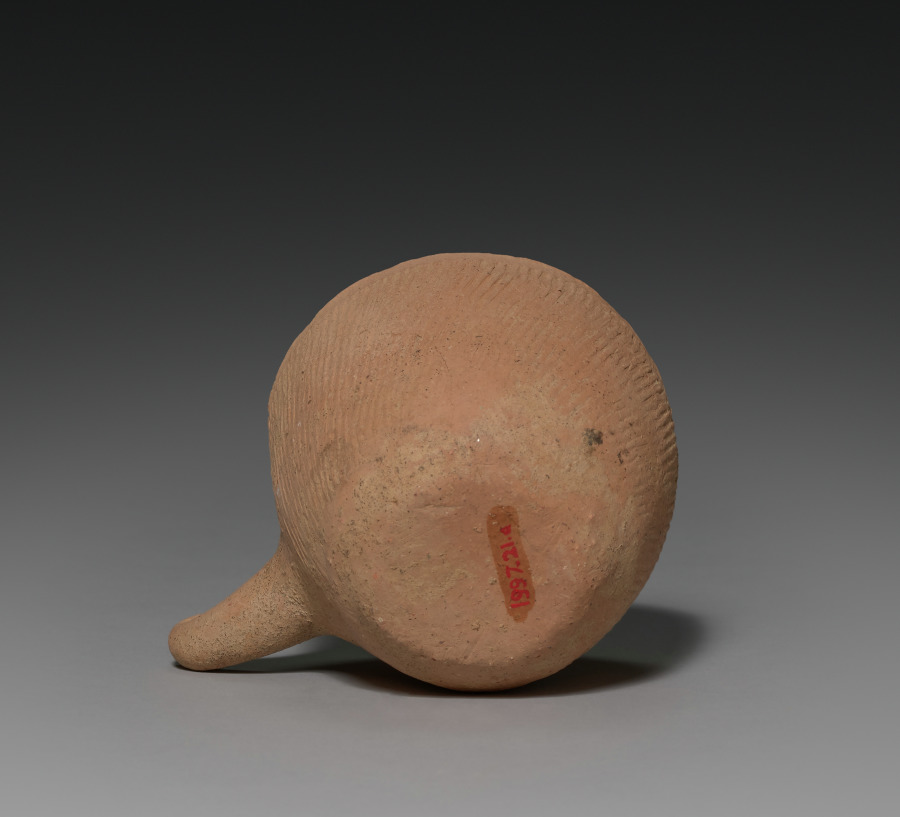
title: Covered Jar with Horn Handle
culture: Korea, Silla (57 BC-935) or Kaya (AD 42-562) period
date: 400s–500s CE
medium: red earthenware with impressed designs and applied red slip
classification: Ceramic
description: Early earthenware from the Three Kingdoms period (57 BCE–668 CE) became widely utilized as agriculture and religion grew to be essential elements in sustaining society and its systems. The clay jars of different sizes and shapes on display were made for the following purposes: some were used to store harvested grains and seeds, some, especially lidded ones such as this example, to preserve cremated remains, and some to serve offerings in rituals.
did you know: Closed kilns built on hillsides became widely used for producing this type of pottery vessel in Korea during the Three Kingdoms period.